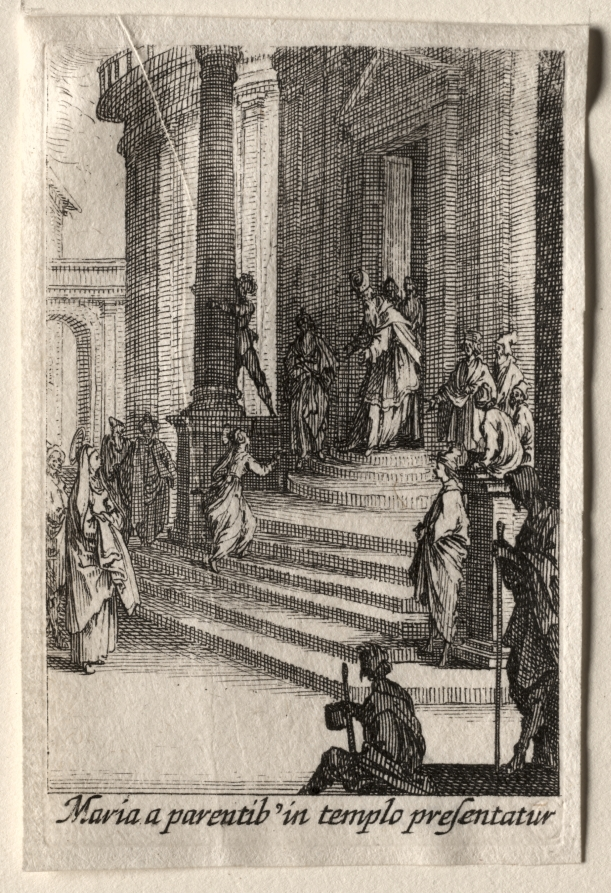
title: The Life of the Virgin: The Presentation of the Virgin in the Temple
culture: France, 17th century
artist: Jacques Callot (French, 1592–1635)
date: ca. 1633–34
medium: etching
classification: Print